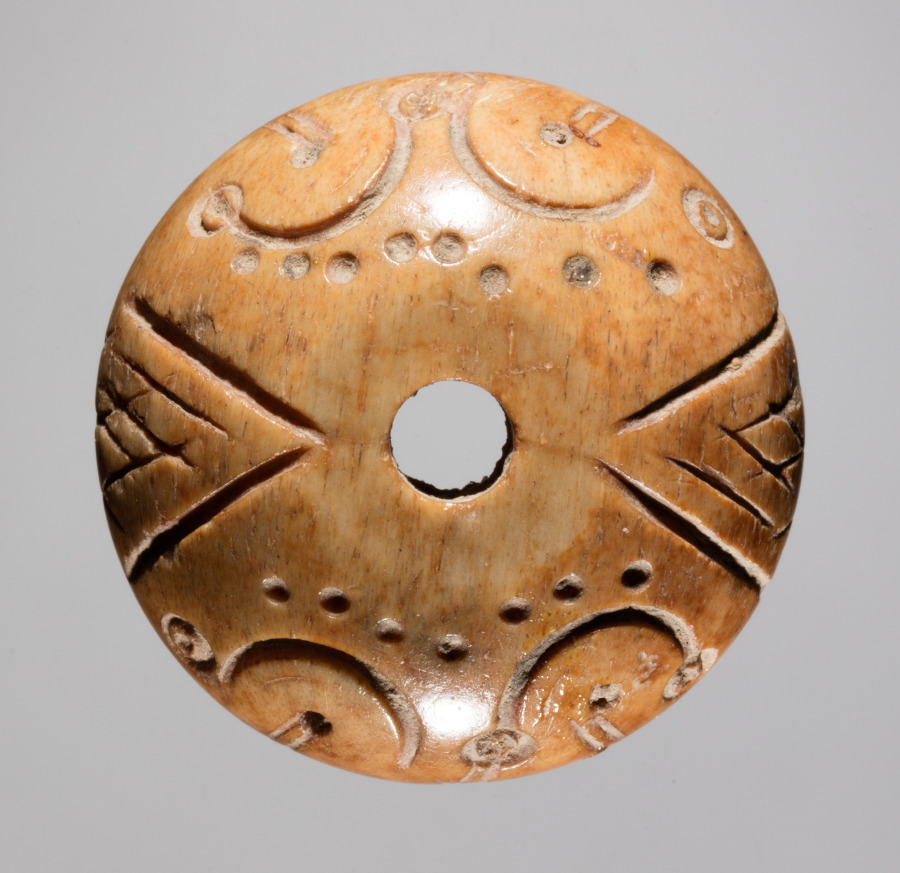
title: Spindle Whorl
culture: Iran, early Islamic period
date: 700s - 900s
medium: bone, incised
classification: Spindle Whorl